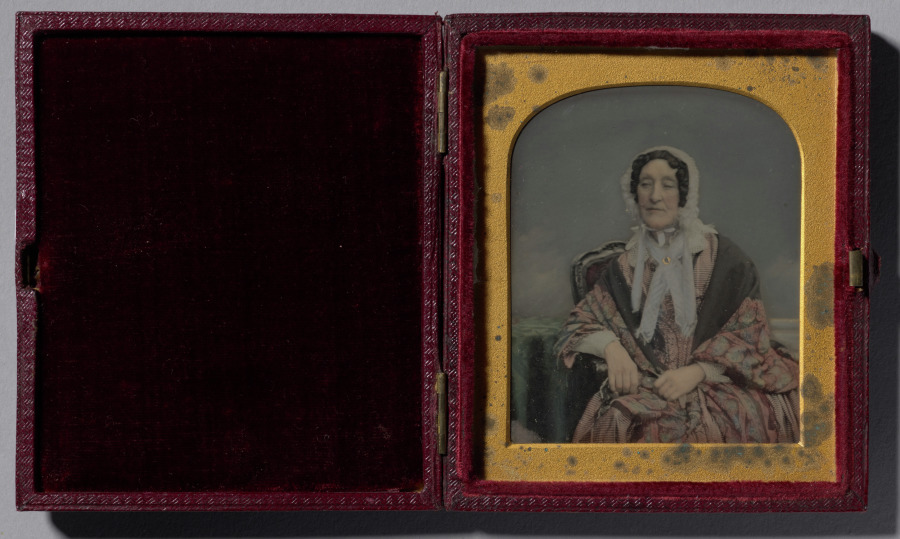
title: High-born lady in white bonnet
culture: France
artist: Antoine Claudet (French, 1797–1867)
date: c. 1855–58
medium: daguerreotype, tinted, sixth plate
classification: Photograph